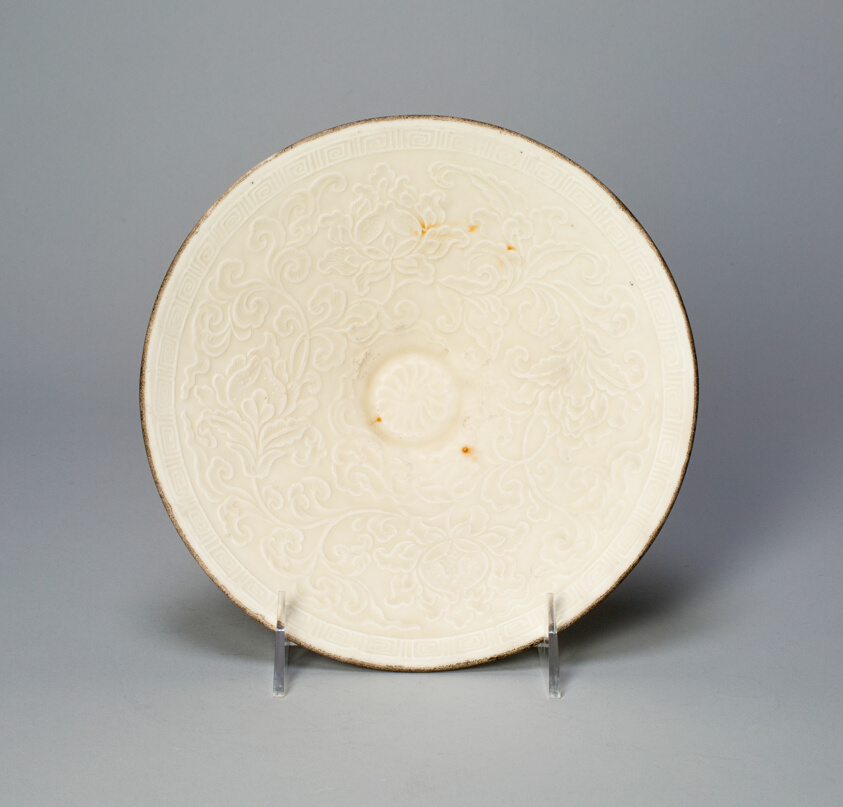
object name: Vessel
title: Bowl with Pomegranates, Peonies, and Stylized Leaves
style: Chinese (culture or style)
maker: China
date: Jin dynasty (1115–1234)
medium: Ding ware; porcelain with underglaze molded decoration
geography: China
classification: bowl; porcelain; dish (vessel); asian art; ceramics; vessel